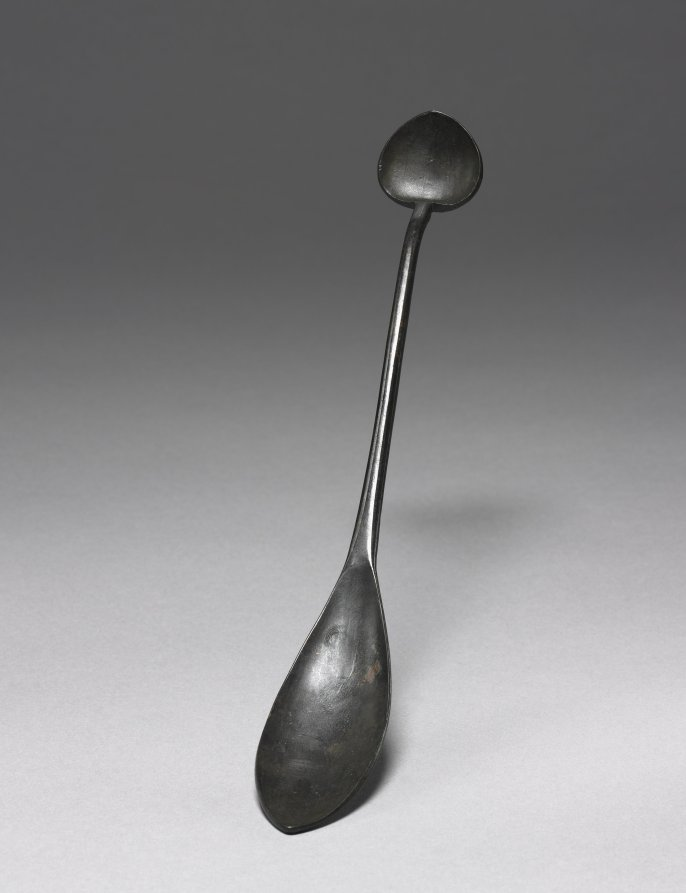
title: Spoon with Dual Heads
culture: Korea, Goryeo dynasty (918–1392)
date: 918–1392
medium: bronze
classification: Metalwork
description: This bronze spoon has dual heads: one is large, and the other small. The smaller head is believed to have been used to hold a small dose of liquid medicine.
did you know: Bronze spoons are the most common burial item. Scholars have proposed that toward the end of the 14th century, Koreans enjoyed meat-based soups more than any other dishes, explaining why spoons became common household items as well as burial goods.